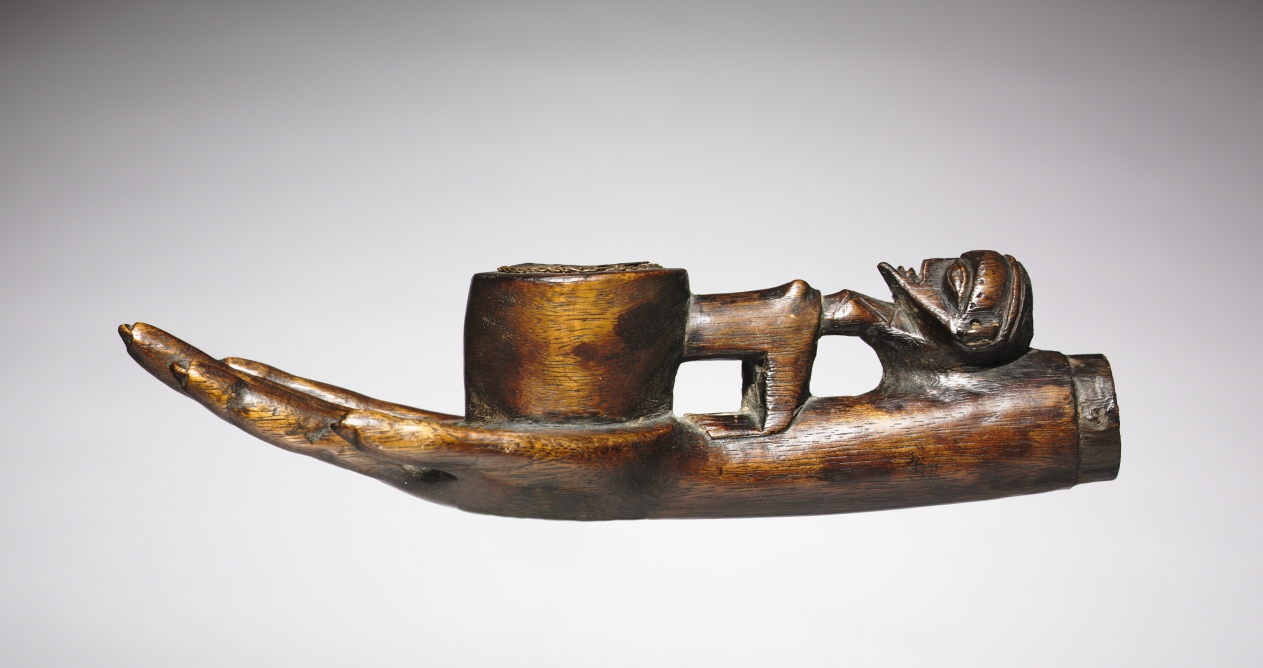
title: Pipe bowl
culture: Africa, Central Africa, Democratic Republic of Congo, Luluwa or Luntu maker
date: early to mid-1900s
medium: Wood, iron, and copper alloy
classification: Implements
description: Tobacco smoking had important social connotations in Central Africa, denoting age, status, and gender. Perhaps the enlarged hand expressed physical and spiritual powers and indicates that this work belonged to a chief. Figuratively carved pipes and snuff mortars constitute important genres of Luluwa decorative arts. As personal objects reflecting the prominence and success of their male and sometimes female owners, they are usually the creative work of virtuoso artists and take a variety of often imaginative shapes.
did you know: The cavity for the tobacco is positioned in the belly of a figure who holds himself up with bent arms on the pipe.